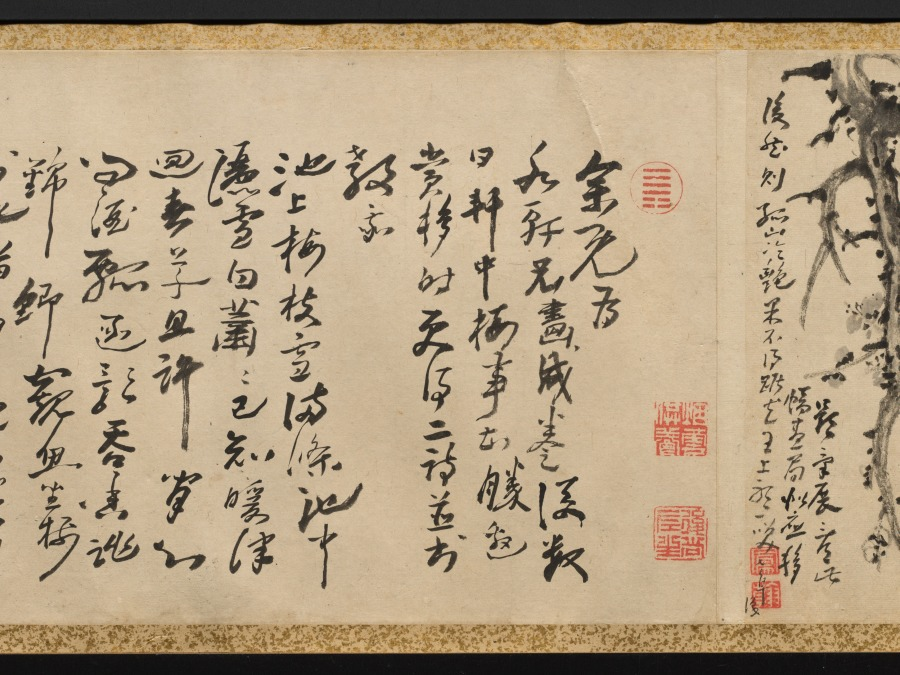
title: Plum Blossoms and Peonies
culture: China, Qing dynasty (1644-1911)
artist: Gao Fenghan (Chinese, 1683–1749)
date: 1741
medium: handscroll, ink on paper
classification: Painting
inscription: Artist's 2 inscriptions and 9 seals (the painting of Peonies with the artist's colophon and the colophon by Hou Chia-fan are on a single sheet of paper). Artist's inscription and 2 seals (Plum Blossoms): [seal] Ts'ai-yün. After finishing writing my colophon, I unrolled the painting to take another look, and it now seems that the composition here should have moved to the later part of the scroll. If that is the case, then the "Cool Beauty" [prunus] of the Solitary Hill is after all unable to take precedence over the "King of Flowers" [peony]. A laugh. Lao-fou inscribed. [seal] Feng-han. Artist's colophon (Plum Blossoms): [3 seals] Tun; Yen-yün-kung-yang, Hou-shang-tso-sheng. A few days after I painted this scroll for Shui- hsien [Yüeh Meng-yüan], the plum blossoms were in full bloom at his residence. He invited me over to enjoy them together for a long while, and I composed two additional poems and wrote them down here for his criticism. [Poems on the colophon are not translated.] First month, twenty-first day, your junior, Kao Feng-han of Nan-fou drafted this with the left hand. [seal] Feng-han. Artist's inscription and 4 seals (Peonies): Brushed with the left hand in the hsin-yu year [1741]. [seal] Yu-hsi. [3 seals at end of painting] Hou-shang-tso-sheng; Yen-yün-kung-yang; Shih-tsao-wu. Artist's colophon and seal (Peonies): The imperial concubine from the Yang family loved to dress in red, And from the emperor won the title of Hai-t'ang. But ever since she became the new dream of the moon palace, She changed into rainbow colors, while learning to dance. After I wrote the poem on Looking for Plum Blossoms in the Teng-wei Mountains, I attached to it a few branches of prunus, some bamboo tips and a piece of rock, with a scattering of green [moss] here and there to fill up the scroll. Unexpectedly, my playful fascination [with these subjects] was still not quite satisfied, so I made up these amorous ideas and romantic images [of the peony], to follow the footsteps of the fair lady of the Ku-hsieh Mountain [prunus]. Furthermore, I picked out one poem to be my vanguard. Perhaps such luminosity of wealth and power will be enough to overwhelm the poor fellows, and [they] will not mind the comparatively short length [of paper] assigned to it. Amusingly inscribed. Please correct me again. To Shui-hsien, my learned senior, your junior Han inscribed again. [seal] Tso-hua [left-handed painting]. 1 additional colophon and 5 additional seals: 1 colophon, dated 1742, and 3 seals of Hou Chia-fan (act. ca. 1742); 1 seal of P'u Ch'üan (20th c.?); 1 seal of Li family (dates unknown).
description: One of the so-called Yangzhou Eccentrics (a group of painters who lived in Yangzhou and were known for their unorthodox art and lifestyle), Gao Fenghan depicts China’s two most loved flowers in full bloom—the “cold beauty,” or plum blossom, in the first section, and the “king of flowers,” or peony, in the second section. Painted in 1741, the year when Gao decided to leave the south and return home to Shandong province in eastern China, this work was likely a token of farewell. His casual brushwork may indicate his mental and physical struggle at the time. After having crippled his right hand in 1737, Gao used his left hand to paint and achieved a crudeness and eccentric style unattainable before.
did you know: In East Asian art, peonies traditionally symbolize prosperity and wealth.